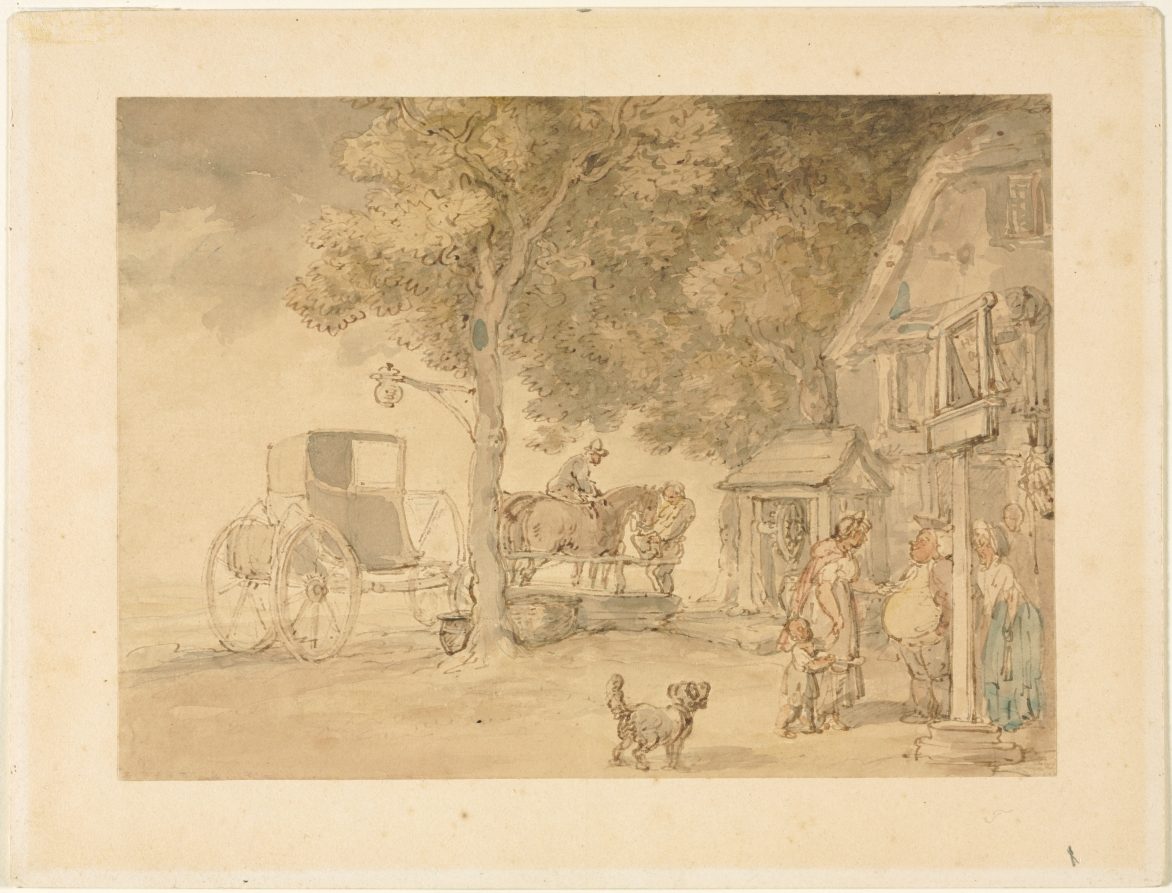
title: Watering Horses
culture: England, 18th century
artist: Thomas Rowlandson (British, 1756–1827)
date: c. 1800–1810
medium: Pen and brown ink and watercolor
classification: Drawing